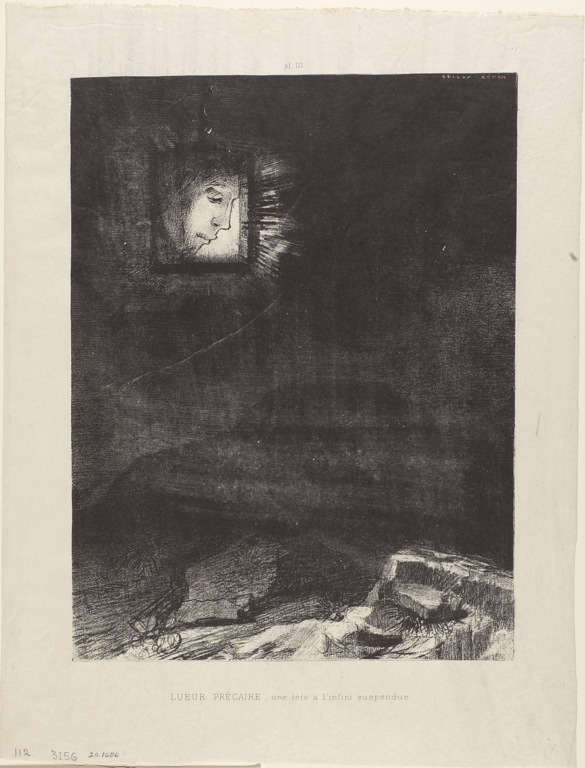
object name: Print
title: Precarious Glimmering, a Head Suspended from Infinity, plate 3 of 6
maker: Odilon Redon (French, 1840-1916)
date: 1891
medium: Lithograph on light gray chine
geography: France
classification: lithograph; print; prints and drawing; paper